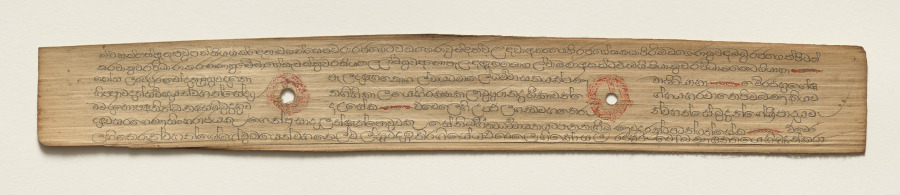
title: Leaf from a Buddhist Manuscript (verso)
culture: Sri Lanka, Singhalese, Late 17th century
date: c. 1700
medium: fiber paper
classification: Manuscript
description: Palm leaf material is still used for manuscripts in Sri Lanka. The palm leaves are prepared first by boiling them, drying them in the sun, and then rubbing them with oils. Scribes then use a metal stylus to incise the text. Then charcoal powder is wiped across the pages, filling in only the inscribed lines.